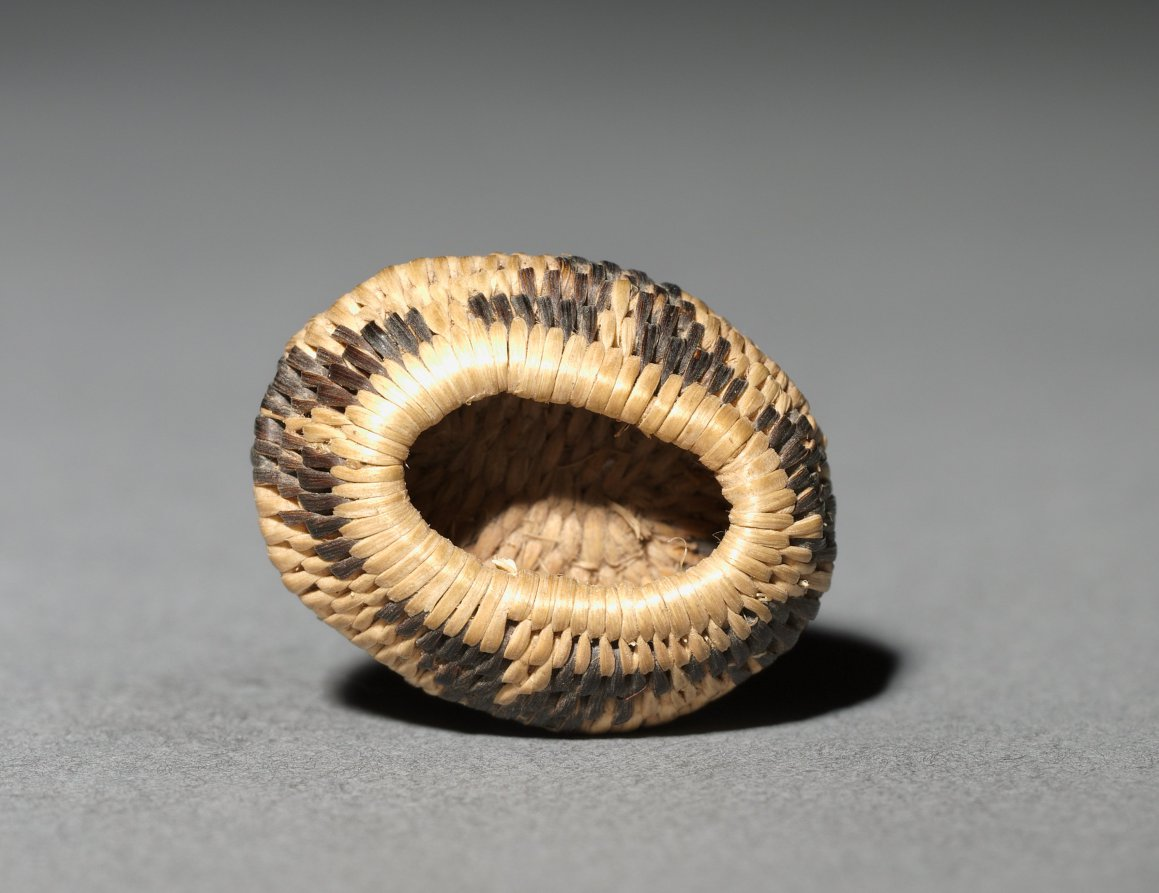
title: Miniature Basket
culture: America, Native North American, Southwest, Arizona, Akimel O'odham (Pima), Unassigned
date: before 1923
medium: plant fiber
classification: Basketry